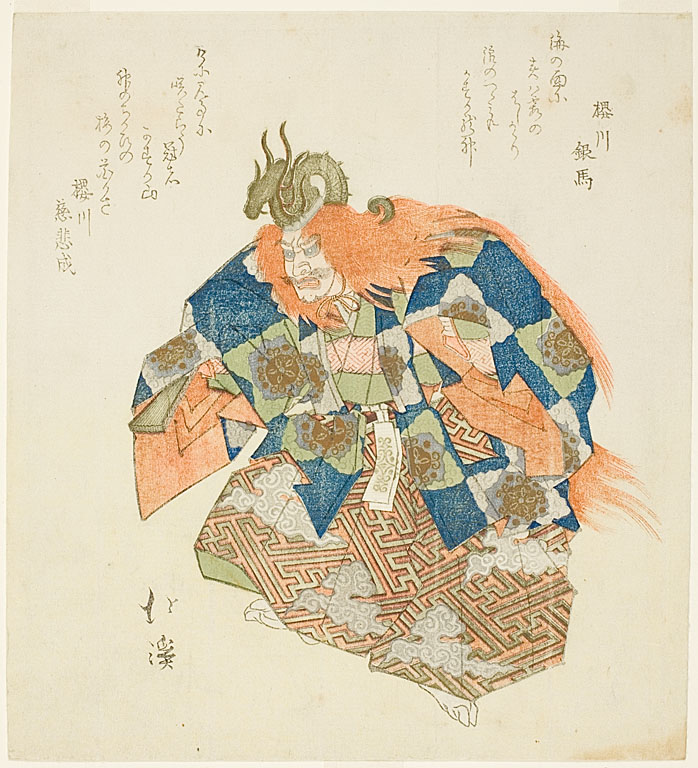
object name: Print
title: Ryuo, the King of Dragon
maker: Totoya Hokkei (Japanese, 1780-1850)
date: 1820 or 1832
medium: Color woodblock print; surimono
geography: Japan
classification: woodblock print; print; asian art